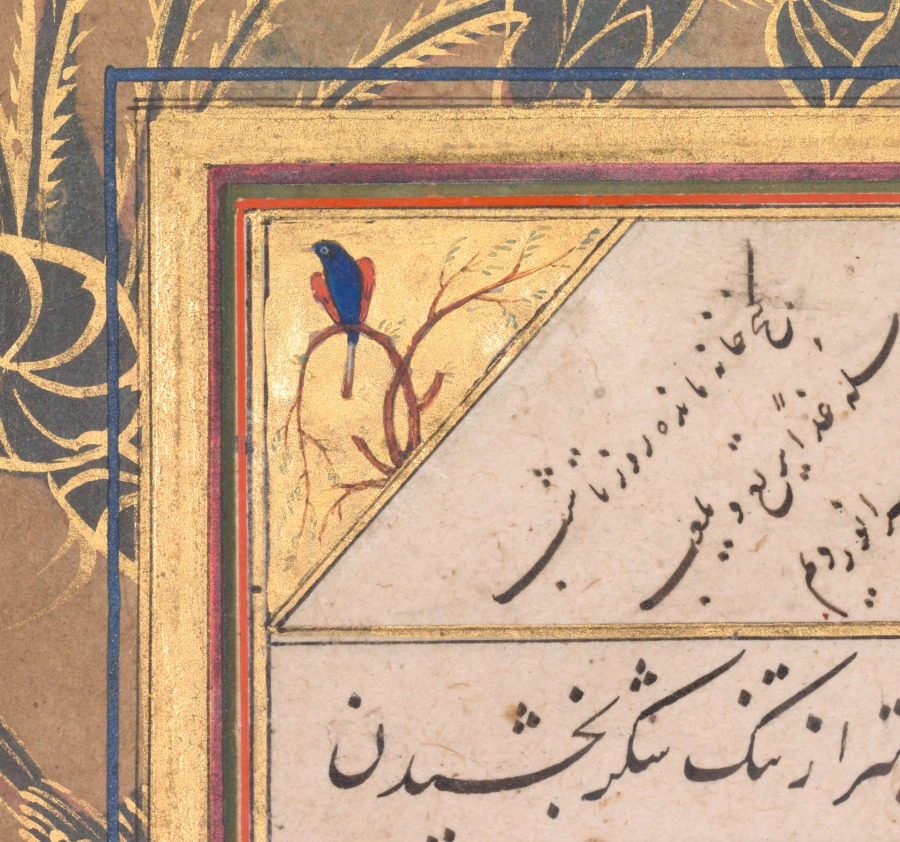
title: Page from a Panj Ganj (Five Treasures) of Abd al-Rahman Jami (Persian, 1414–1492), with two Persian masnavis: Yusuf va Zulaykha (Joseph and Zulaykha) and Subhat al-abrar (Rosary of the Righteous) (verso)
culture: Northern India, Mughal, early 17th century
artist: Mushfiq (Indian, active early 1600s)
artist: and others (Indian)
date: 1520–1607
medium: Gum tempera, ink, and gold on paper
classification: Painting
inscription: The miniature signed at upper left: ' amal - i Mushfiq sana 1015 (the work of the Mushfiq year 1015) Text on verso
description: This page is from a prized manuscript owned by one of the most respected statesmen of the imperial Mughal court, Abd al-Rahim. He served as the Khan Khanan, or vizier, the trusted minister under both Akbar and Jahangir. Abd al-Rahim was an avid book collector and patron of the arts. He acquired this book of five extended narrative poems, which included the story told in rhyme of the romance between Joseph and the Egyptian lady Zulaykha, about 80 years after its completion. The book’s illumination had not been finished, so Abd al-Rahim commissioned the exuberant decor of the borders and insets along with fullpage paintings that illustrate key scenes in the text.